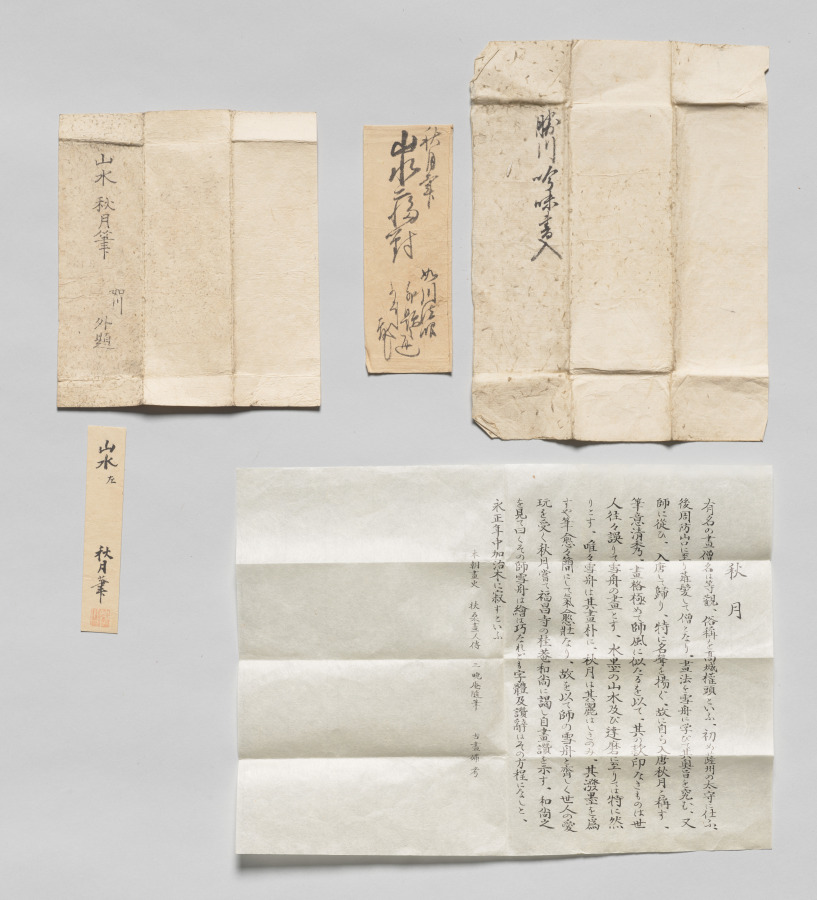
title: Landscapes with Figures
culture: Japan, Muromachi period (1392–1573)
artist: Shūgetsu Tōkan (Japanese, 1440?-1529)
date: c. 1500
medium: pair of hanging scrolls; ink on paper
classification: Painting